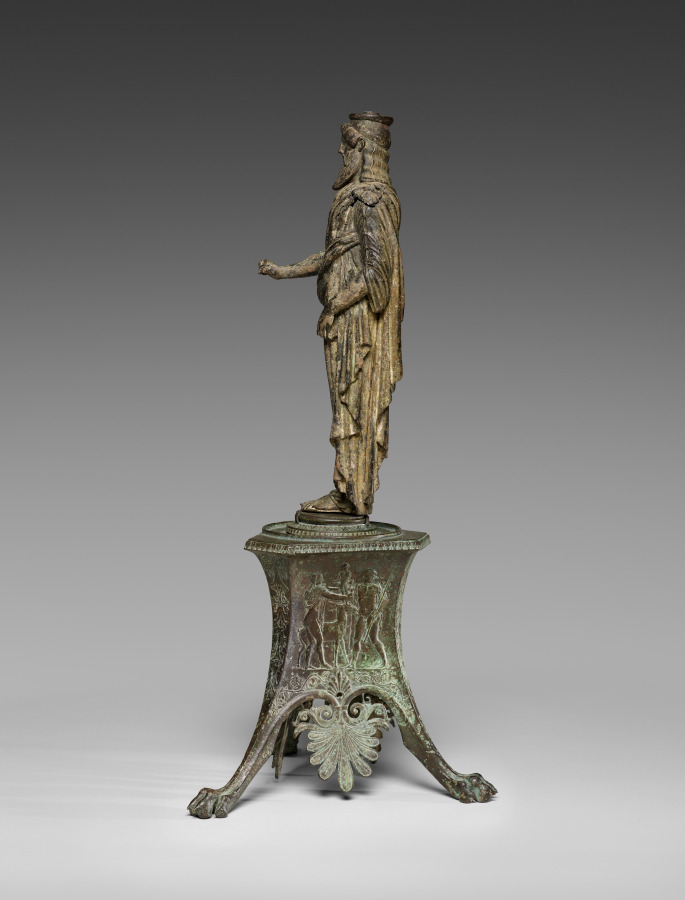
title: Statuette of Dionysos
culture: Italy, Roman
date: 50 BCE–50 CE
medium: bronze and silver and traces of gilding, hollow cast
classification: Sculpture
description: This bronze figure of Dionysos, the god of wine, theater, and the mysteries, is presented in a style recalling Archaic Greek art, most noticeably in his stiff pose and trimmed beard. The more naturalistic folds of his garment speak to a later date, in the Roman period. The disk attached at the top of the head suggests that this figure was once part of an ornate piece of furniture, perhaps a stand or support. In his right hand, the god likely held a kantharos or other attribute. He would have been further embellished with inlaid copper (lips), silver (whites of eyes), and perhaps gilding (garment).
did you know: Over his long, thin garment, Dionysos wears an animal skin, fastened on his left shoulder.